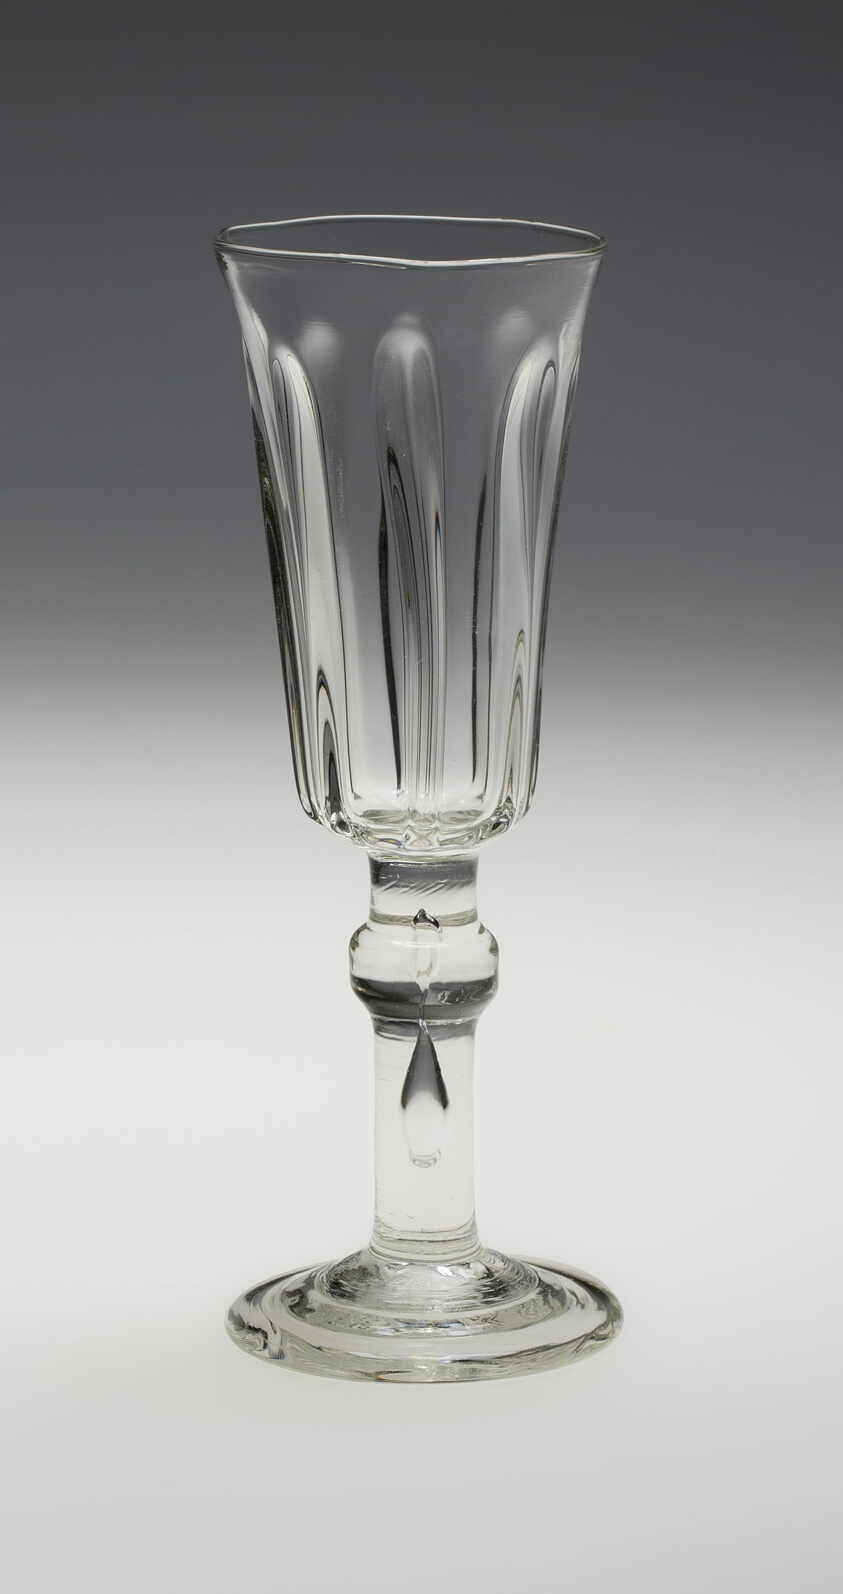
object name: Glass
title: Wine Glass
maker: England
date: c. 1740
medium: Glass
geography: England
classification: drinking vessel; european decorative arts; glass